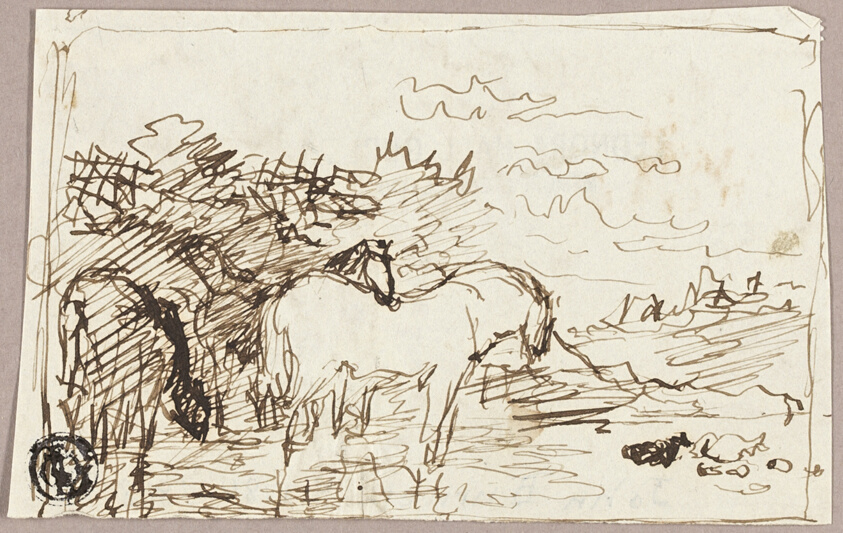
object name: Drawing and Watercolor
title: Sketch of Horses Standing in Water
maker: John Burnet (Scottish, 1784-1868)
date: c. 1847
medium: Pen and brown ink, on ivory wove paper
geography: Scotland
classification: pen and ink drawings; drawings (visual works); prints and drawing